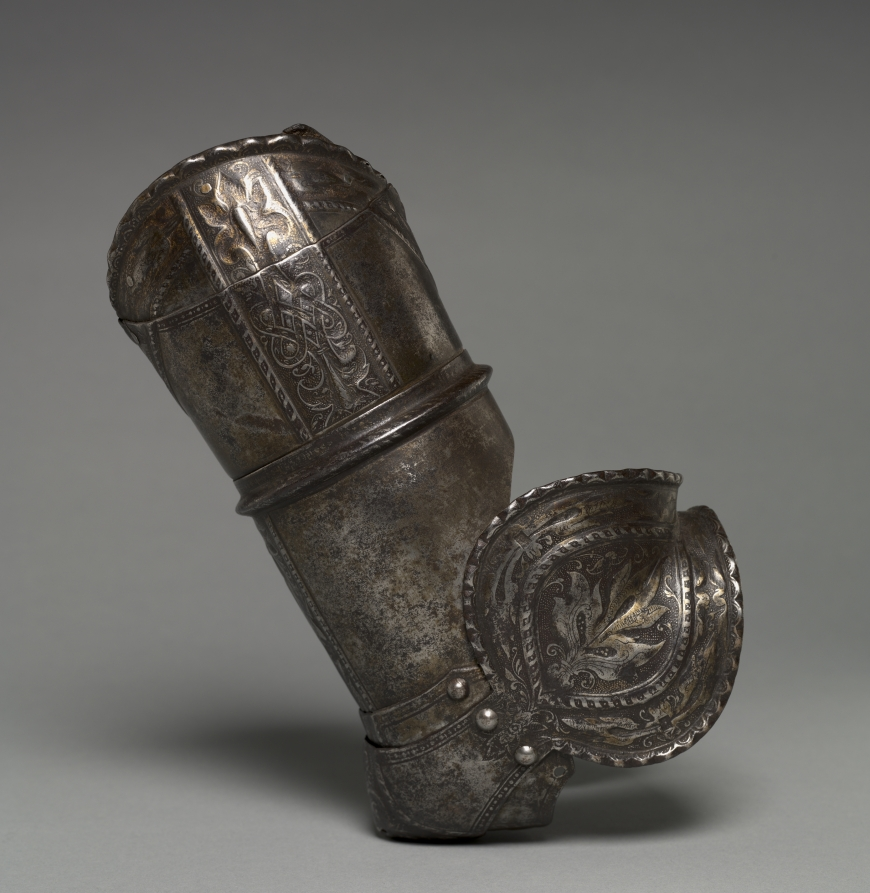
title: Right Arm Elements from a Boy's Armor (Rerebrace with Couter)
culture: Germany, Augsburg, mostly 16th Century (some modern)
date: c. 1560 (some modern)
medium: etched and lightly embossed steel with traces of gilding, leather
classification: Arms and Armor